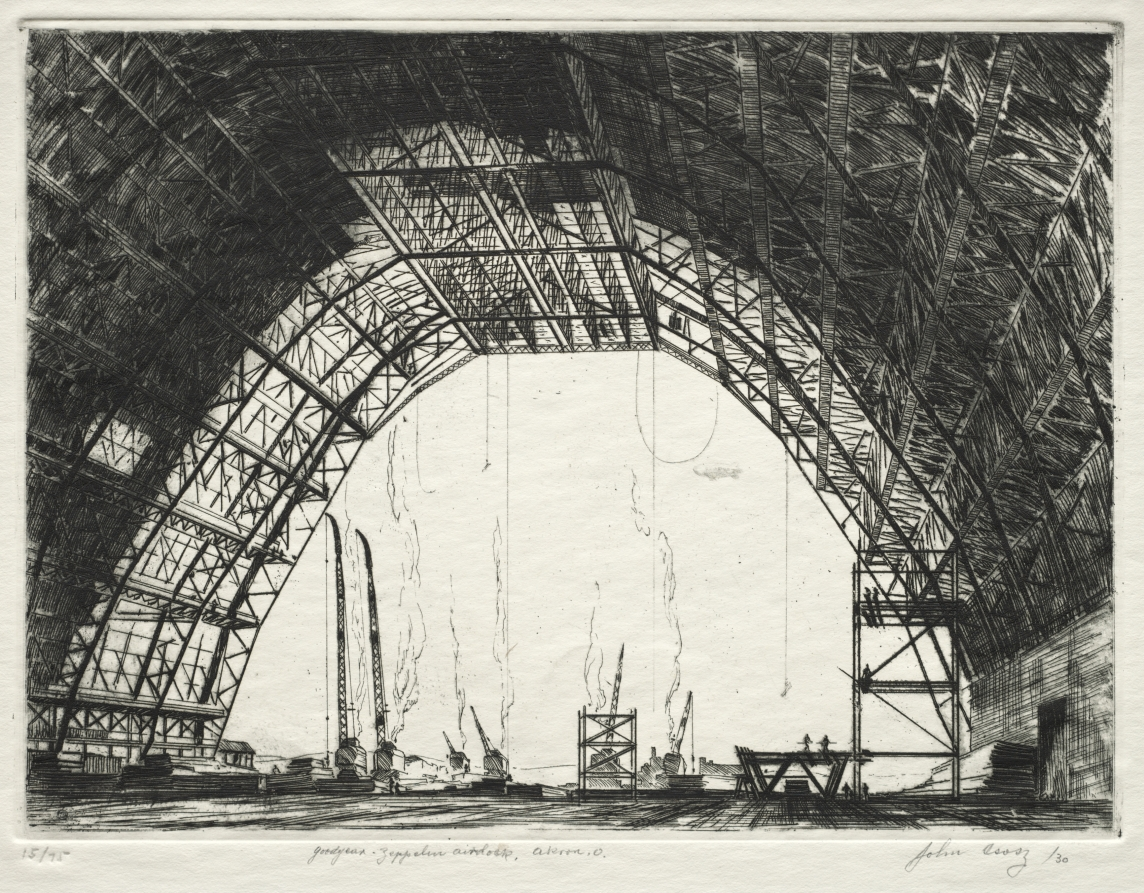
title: Goodyear Zeppelin Air Dock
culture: America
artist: John Csosz (American, 1879–1969)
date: 1930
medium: etching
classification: Print